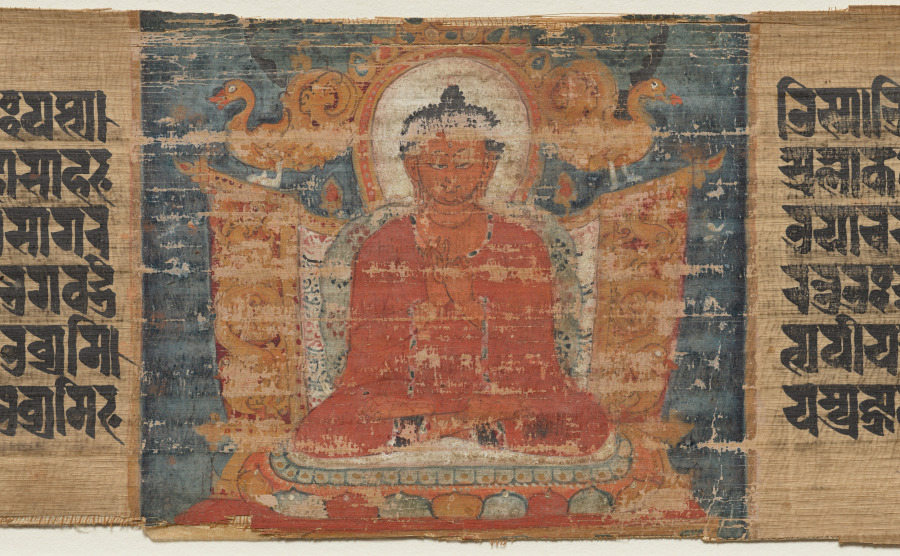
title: Text, folio 186 (recto), from a Manuscript of the Perfection of Wisdom in Eight Thousand Lines (Ashtasahasrika Prajnaparamita-sutra)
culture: Eastern India, Bihar, Vikramashila Monastery. Painting: Nepal, Kathmandu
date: Sunday, September 14, 1119 (year 239 of the Newar Samvat in the month of Ashvina)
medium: Gum tempera and ink on palm leaf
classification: Painting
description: This manuscript, consisting of 188 double-sided folios, was calligraphed by a scribe at a monastery in northeastern India, commissioned by a monk from Nepal. Judging from the style of the paintings, they are the work of Nepalese artists.